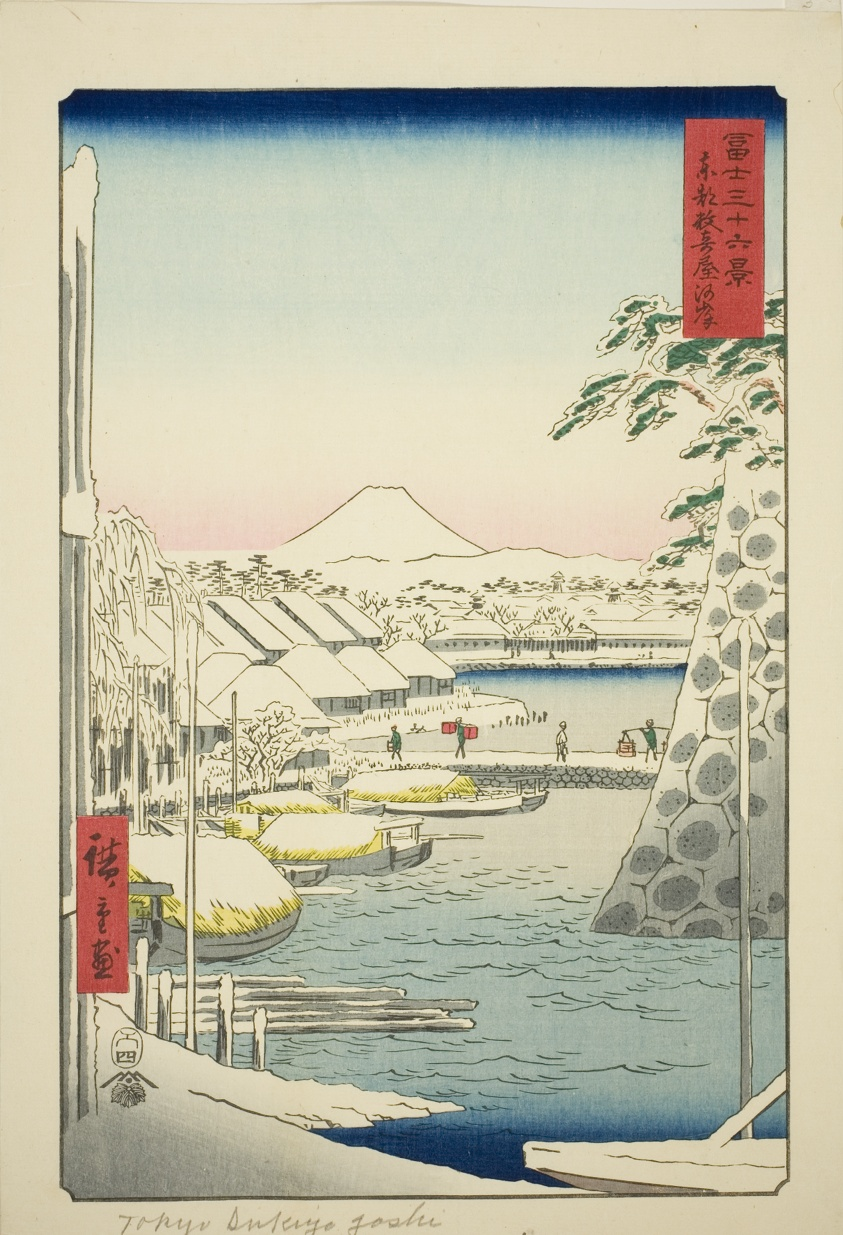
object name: Print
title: The Riverbank at Sukiya in the Eastern Capital (Toto Sukiyagashi), from the series "Thirty-six Views of Mount Fuji (Fuji sanjurokkei)"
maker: Utagawa Hiroshige 歌川 広重; Japanese, 1797-1858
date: 1858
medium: Color woodblock print; oban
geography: Japan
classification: woodblock print; print; asian art